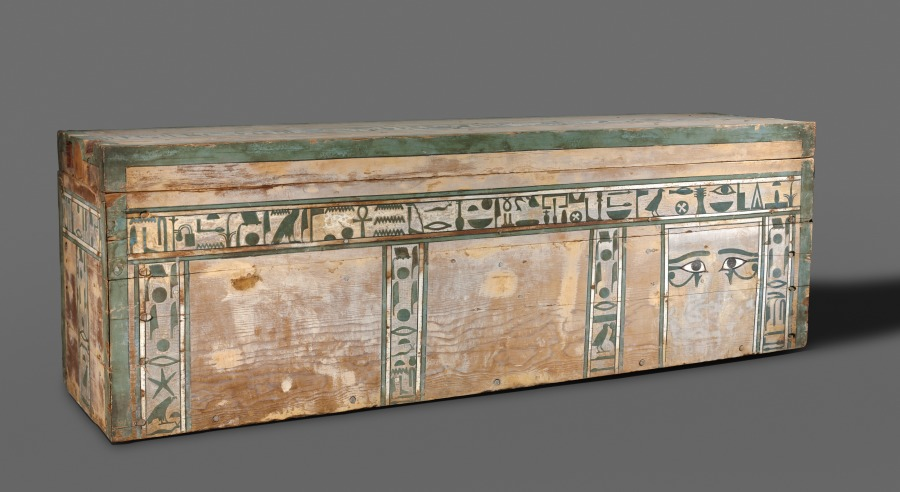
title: Coffin of Senbi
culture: Egypt, Meir, Middle Kingdom, mid-Dynasty 12, reign of Amenemhat II to Sesostris III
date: c. 1918–1859 BCE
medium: gessoed and painted cedar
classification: Funerary Equipment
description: The most common type of coffin during the Middle Kingdom took the shape of a rectangular box with lid. The mummy inside was placed on his left side, facing east, his head behind the two magical eyes. These—in the shape of human eyes, to which have been added the markings of a falcon's head—were supposed to enable him to behold the rising sun, reborn daily. The long horizontal inscriptions are prayers to Anubis (god of embalming) and Osiris (god of the dead) for offerings of food and drink and other items necessary for survival in the afterlife. The short vertical inscriptions place him under the protection of the gods of earth, sky, air, and moisture, as well as various funerary deities.